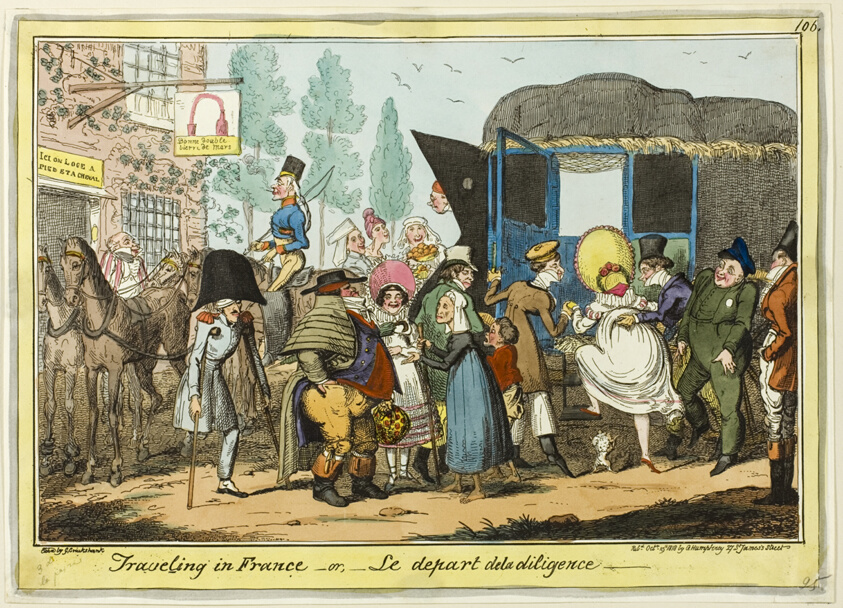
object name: Print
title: Traveling in France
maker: George Cruikshank (English, 1792-1878); published by George Humphrey (English, c. 1773-1831)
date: published October 19, 1818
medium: Hand-colored etching on paper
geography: England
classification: etching; print; prints and drawing